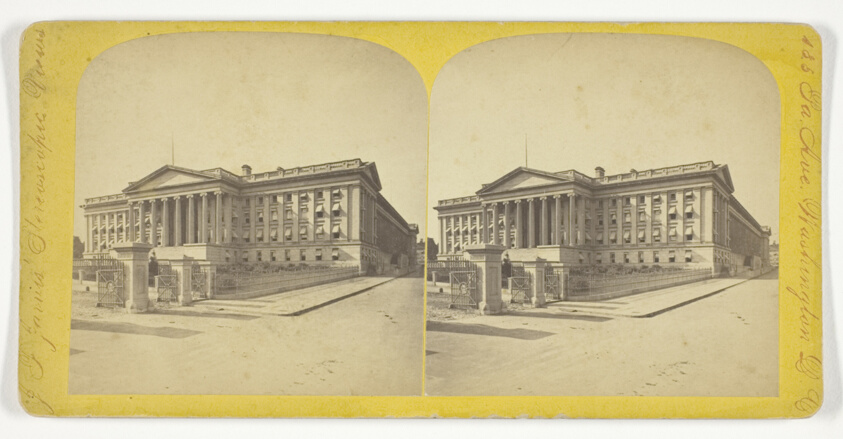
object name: Photograph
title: U.S. Treasury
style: 19th century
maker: J. F. Jarvis (American, 1850-1931)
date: Late 19th century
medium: Albumen print, stereo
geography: District of Columbia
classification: photography; photograph; albumen silver print; stereograph (albumen)